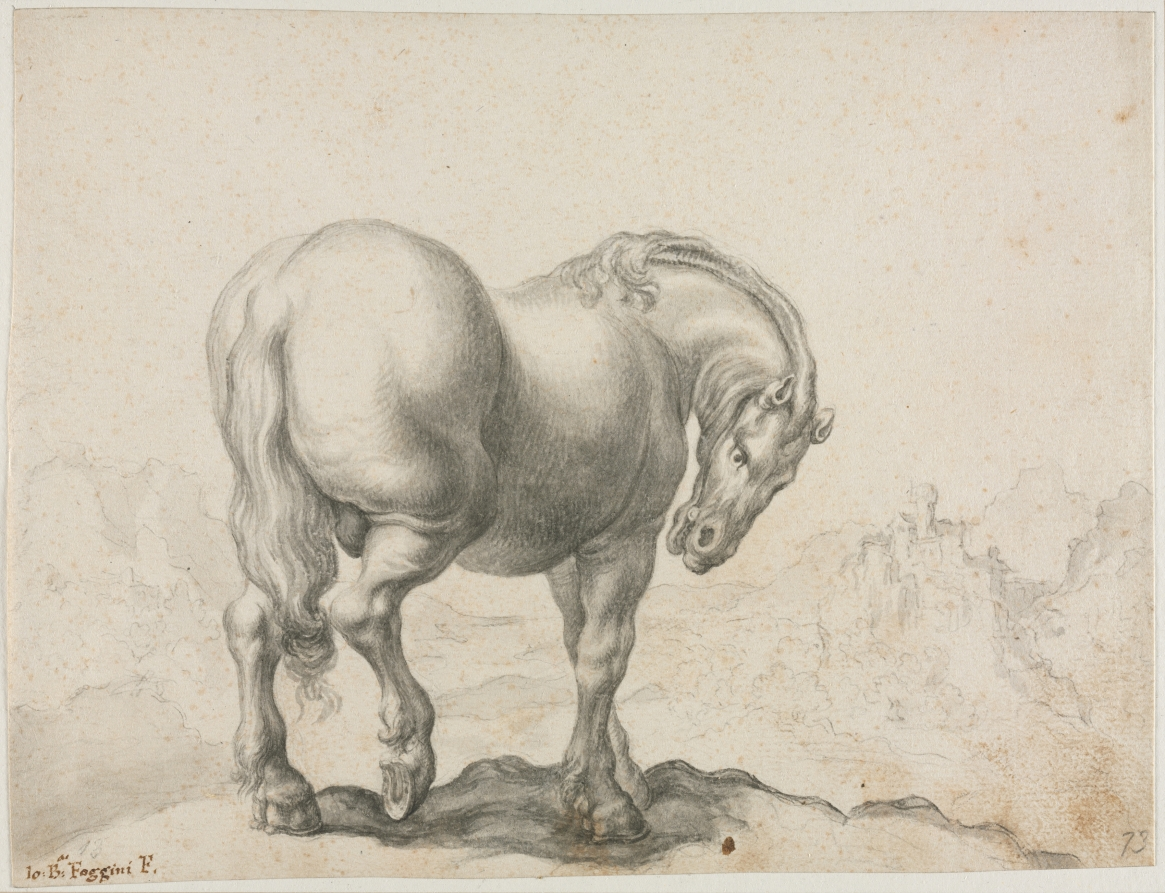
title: Study of a Stallion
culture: Italy, 18th century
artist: Giovanni Battista Foggini (Italian, 1652–1725)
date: first third 18th century?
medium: black chalk and brush and gray wash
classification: Drawing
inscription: [signed?], lower left, in brown ink: Io: Ba: Foggini F. ; lower left, in graphite: 13 ; lower right, in graphite: 73